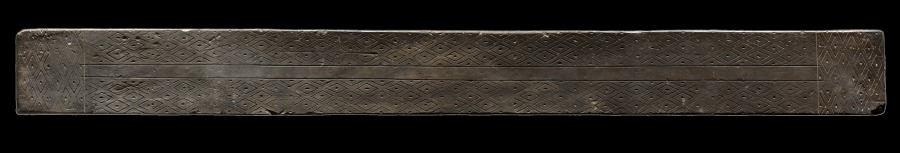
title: Tomb Tile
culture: China, Henan province, Jincun, Eastern Zhou dynasty (770–256 BCE)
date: 771–256 BCE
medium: earthenware with stamped decoration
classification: Ceramic